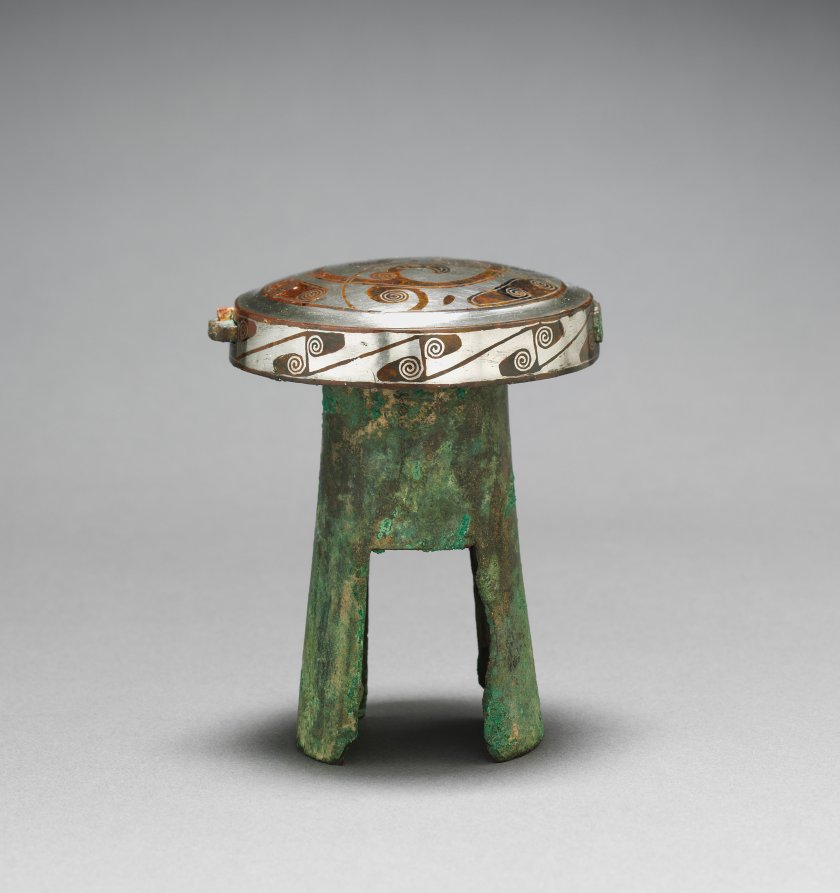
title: Chariot Handle Bar Cap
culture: China, Warring States period (475–221 BCE)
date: 475–221 BCE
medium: bronze inlaid with silver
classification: Metalwork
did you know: The cap was partially inlaid with silver to form the pattern of three stylized bird heads radiating from center.